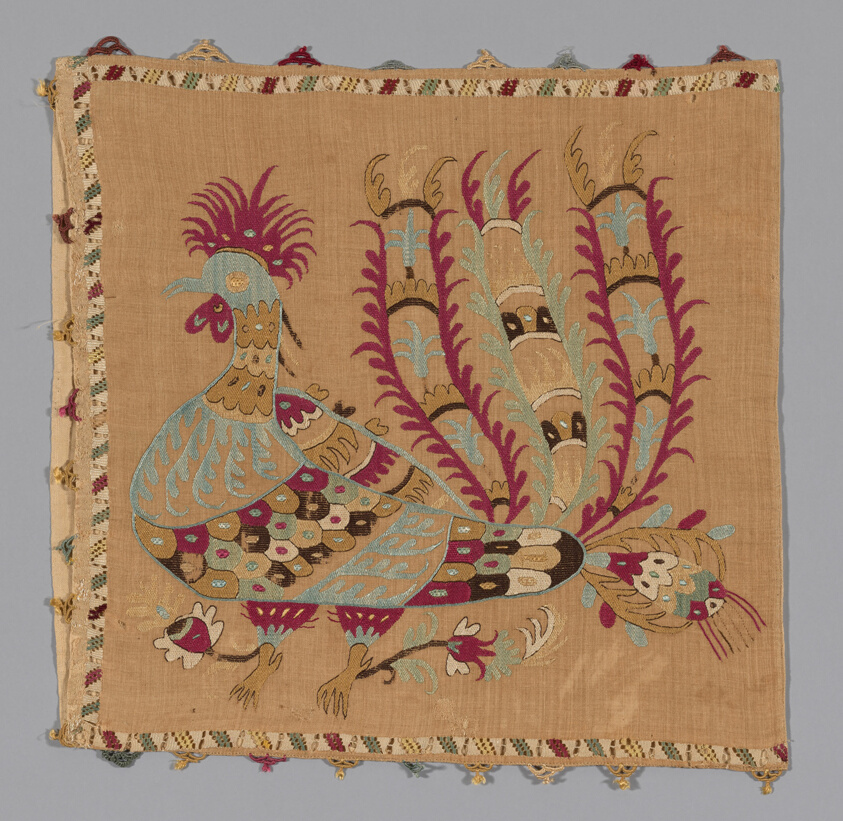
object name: Textile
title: Pillow Cover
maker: Greece, Northern Sporades Islands, Skíros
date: 17th century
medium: Linen, plain weave; embroidered with silk in running (pattern darning), satin, and stem stitches; border of cut and drawn work embroidered with silk in darning stitches and overcast bars; edged with silk in buttonhole picots with attached tassels; backed with linen, plain weave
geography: Skíros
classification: textile; needlework (visual works)